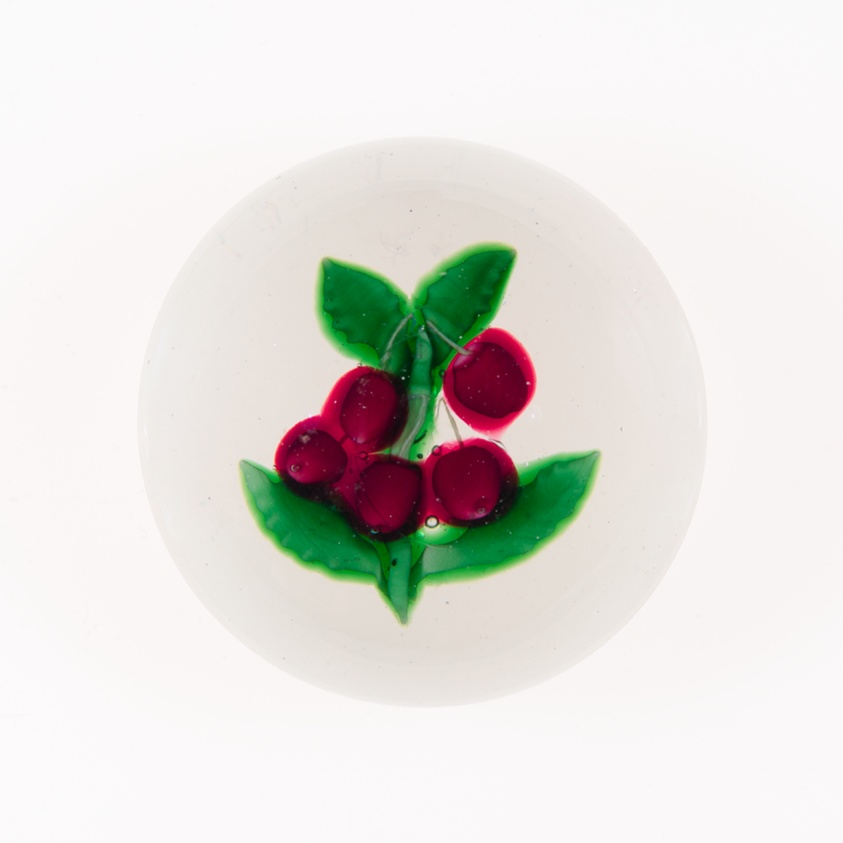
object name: Glass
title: Paperweight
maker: Saint-Louis Glassworks (Cristalleries de Saint-Louis); Lorraine, France, founded 1586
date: 19th century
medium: Glass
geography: Saint-Louis-lès-Bitche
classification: paperweight; lampwork; european decorative arts; glass